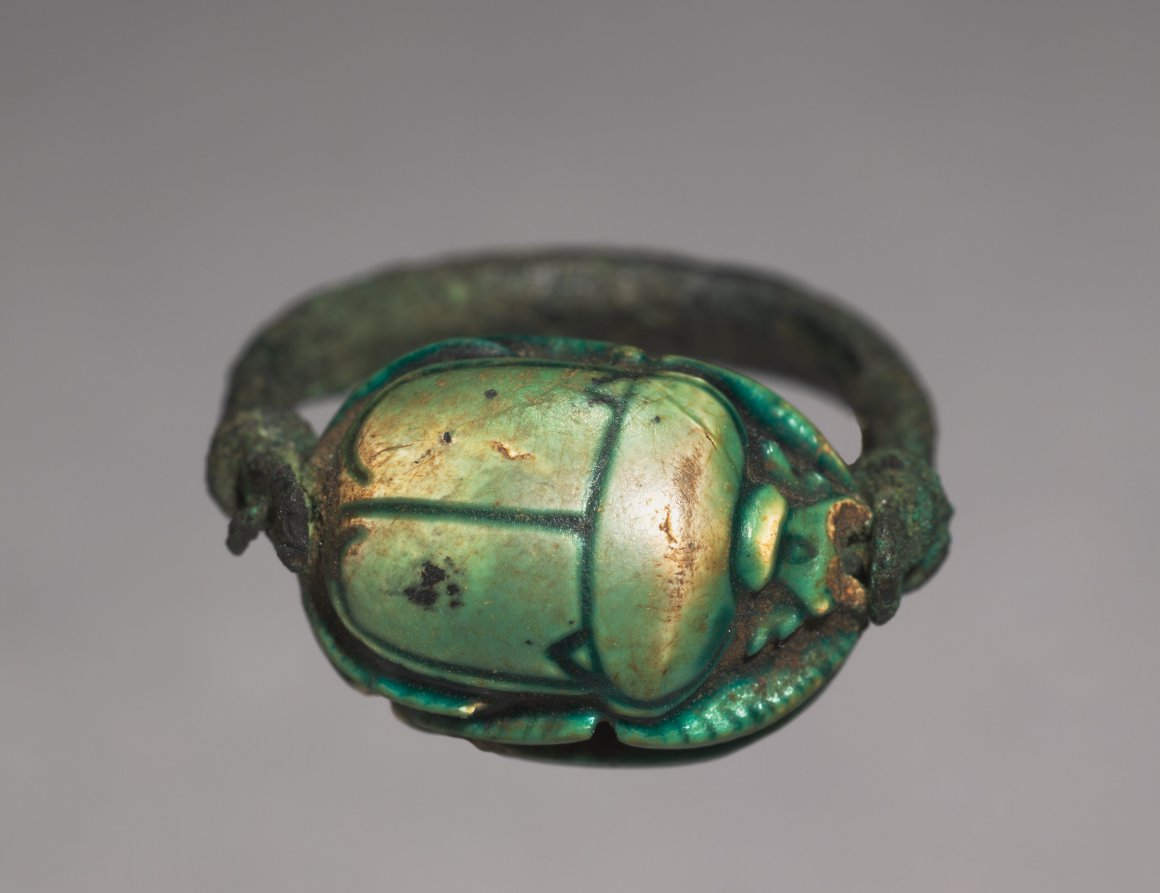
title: Scarab Ring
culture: Egypt, New Kingdom (1540–1069 BCE), Dynasty 19, reign of Ramesses II (1279–1213 BCE)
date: 1279–1213 BCE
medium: green glazed steatite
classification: Scarabs